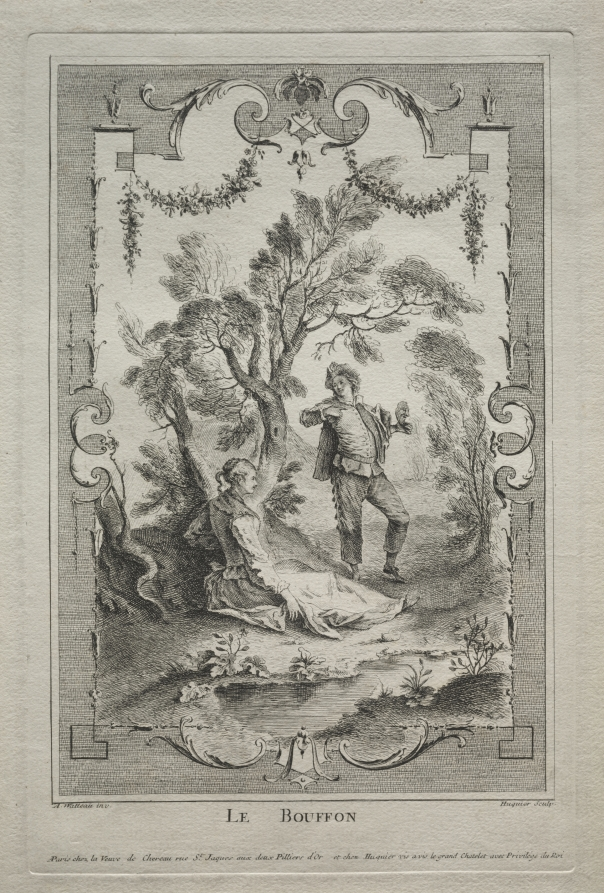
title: The Buffoon, Arabesque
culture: France, 18th century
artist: Gabriel Huquier (French, 1695–1772)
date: c. 1730–70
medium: engraving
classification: Print